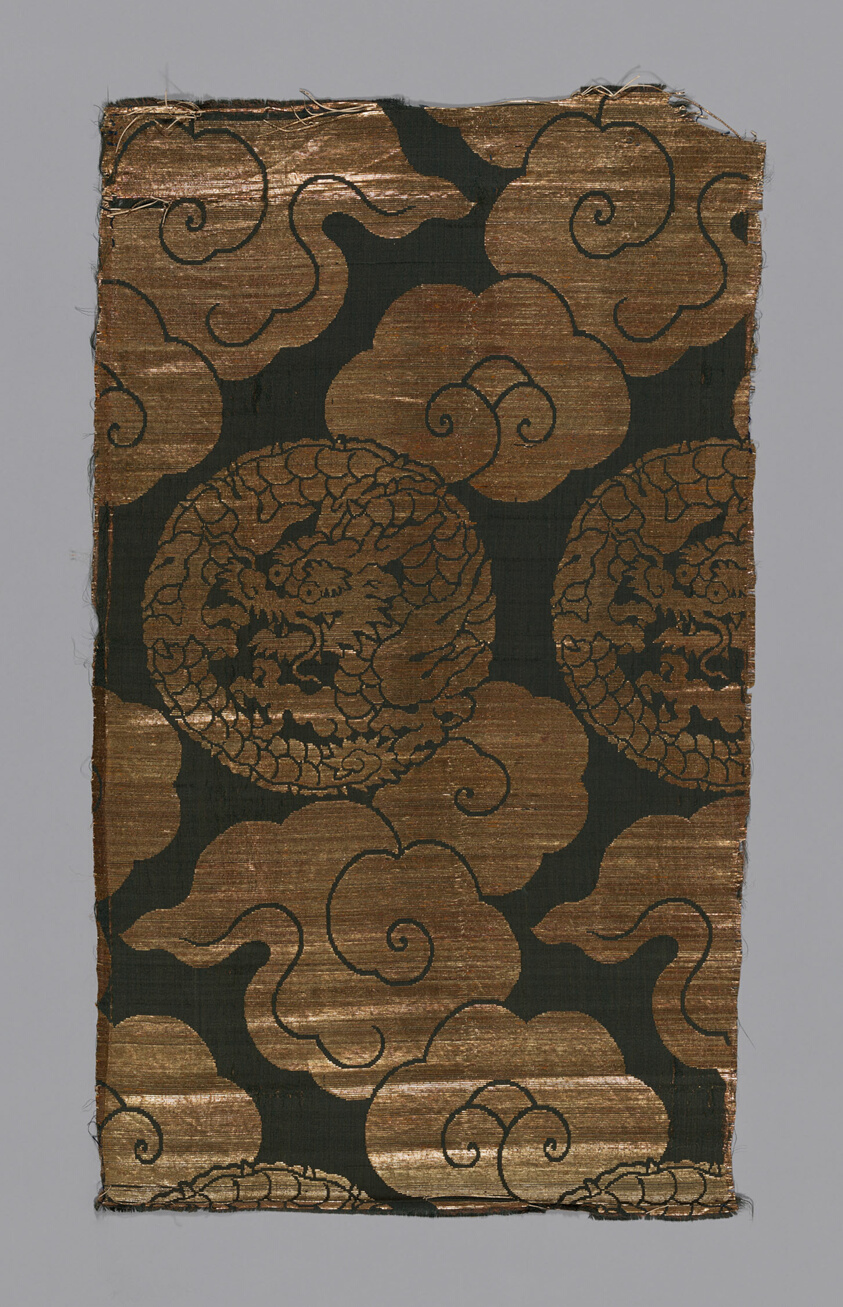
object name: Textile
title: Fragment (From a Temple Hanging)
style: late edo, Japanism, East Asian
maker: Japan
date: late Edo period (1789–1868), 1801/25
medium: Silk and gold-leaf-over-lacquered-paper strip, warp-float faced 3:1 'Z' twill weave with plain interlacings of secondary binding warps and supplementary patterning wefts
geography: Japan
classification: textile; weaving